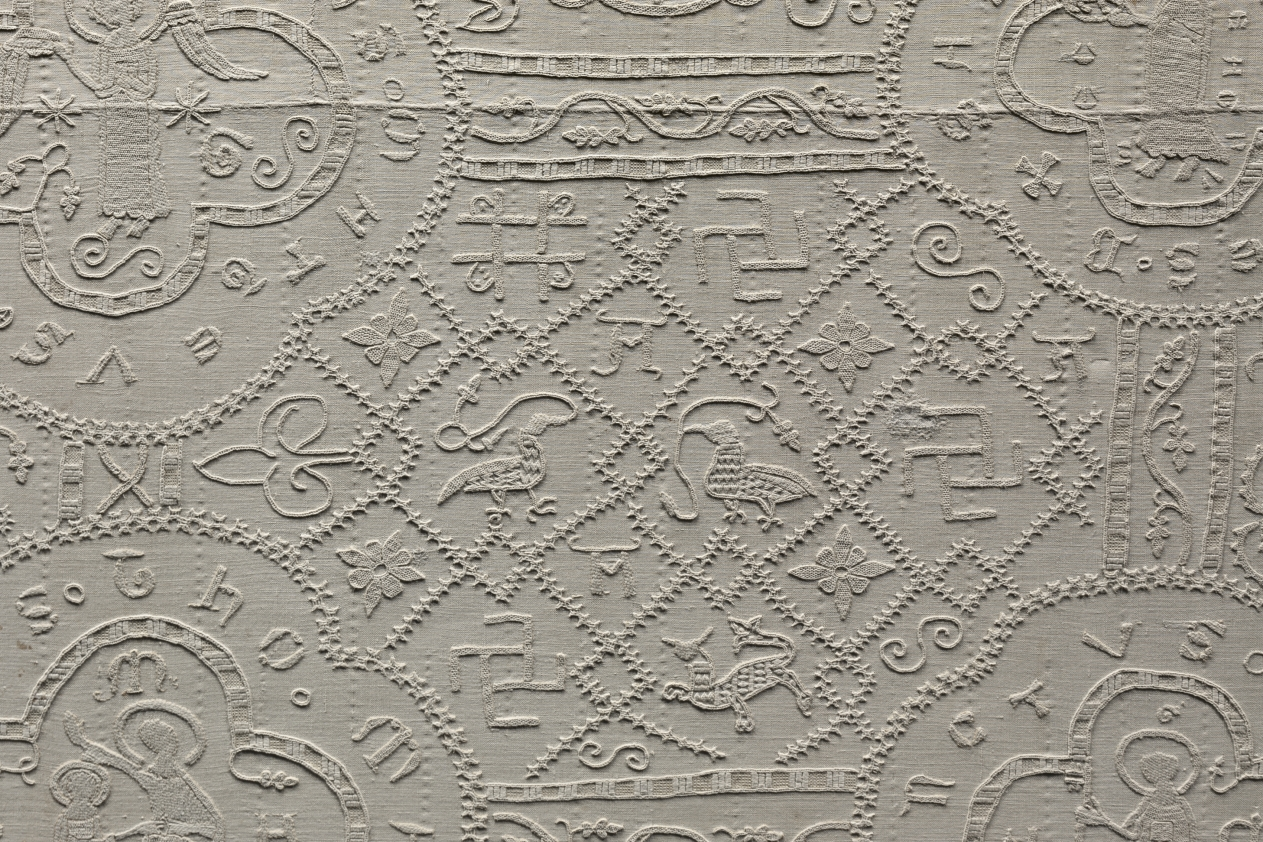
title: Altar Cloth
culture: Germany, Altenberg on the Lahn, Premonstratensian Convent, 14th century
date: c. 1350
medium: embroidery: linen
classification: Embroidery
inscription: various motifs enclosed in quatrefoils with identifying inscriptions in Gothic letters.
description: This large, embroidered altar cloth is one of the rarest, most important medieval church furnishings in existence. It was stitched by nuns in the Premonstratensian Convent in Altenberg on the Lahn River, north of Frankfurt, Germany, and was used to cover the church’s high altar in the weeks leading up to Easter. The cloth is an example of linen embroidery, a specialty of German nuns in the later Middle Ages. The Altenberg monastery church once had valuable furnishings; the high altar retable (a decorated frame with sculptures and paintings on the top of an altar) has survived, the main parts of which are now in the Städel Museum in Frankfurt, Germany.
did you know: When lit from behind, the previously hidden details emerge and the complex design becomes evident.